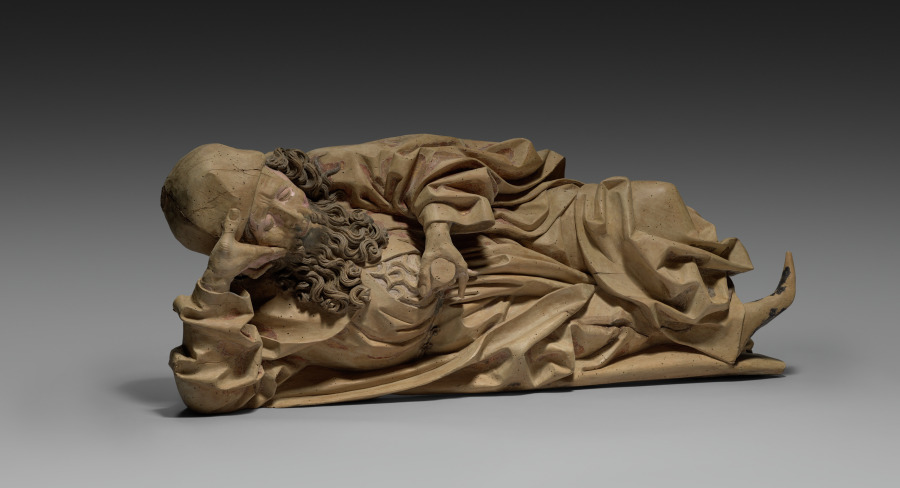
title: Jesse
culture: Germany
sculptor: Veit Stoss (German, c. 1445–1533)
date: c. 1500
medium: Limewood, polychromed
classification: Sculpture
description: The figure shows the sleeping Jesse, the father of David from the Old Testament. As the ancestor of the family tree of Christ, he was depicted in the Middle Ages sleeping as the starting point of the tree, on whose branches the ancestors of Christ are depicted. Mary with the Christ child is always shown at the top. The figure comes from a wooden altarpiece from an unknown church, possibly in Nuremberg, which is now lost. Veit Stoss is one of the most prominent German sculptors around 1500 who was mainly active in Nuremberg (Bavaria, Germany) and Krakow (Poland), also as a painter and engraver.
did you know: The family tree of Christ starts from Jesse, the father of David in the Old Testament.